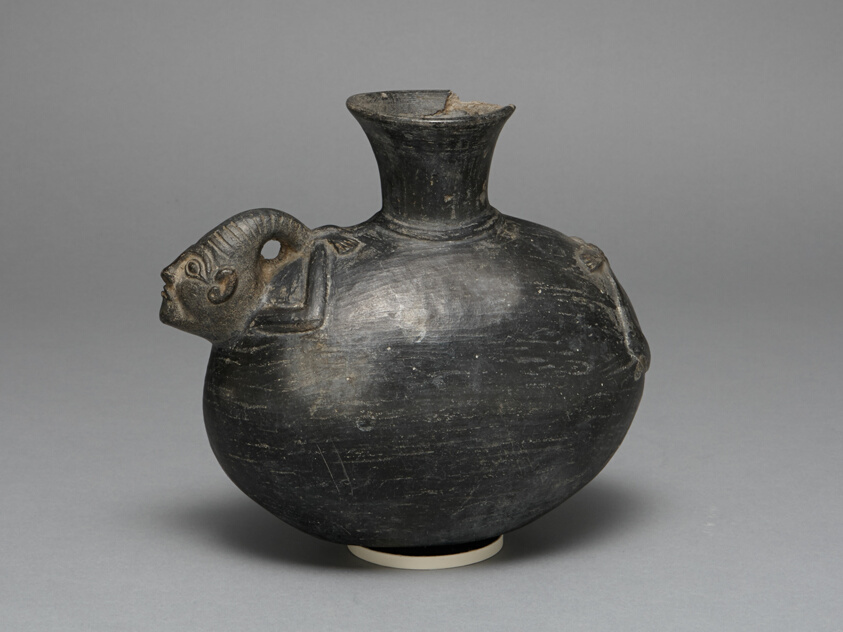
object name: Vessel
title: Blackware Jar in the Form of a Figure with Bound Arms and Legs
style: chimú, late intermediate period, Pre-Columbian, americas, Arts of the Americas, andean, andes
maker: Chimú (North coast, Peru)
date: 1200–1450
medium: Ceramic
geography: Peruvian North Coast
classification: blackware (black basaltes); earthenware; ceramics; vessel; art of the americas